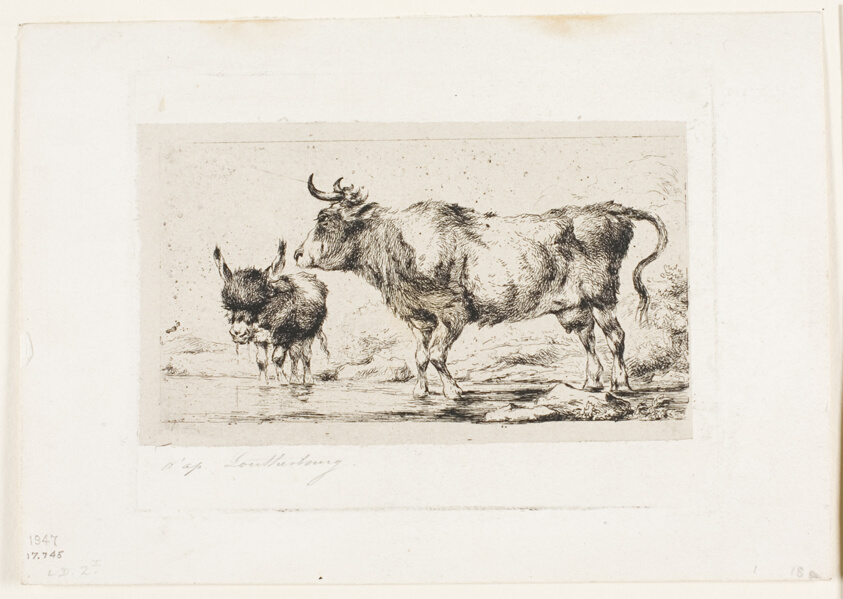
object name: Print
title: The Cow and Ass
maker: Charles Meryon (French, 1821-1868); after Philip Jacques de Loutherbourg (French, 1740-1812)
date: 1849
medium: Etching on buff chine, laid down on ivory wove paper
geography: France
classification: etching; print; prints and drawing